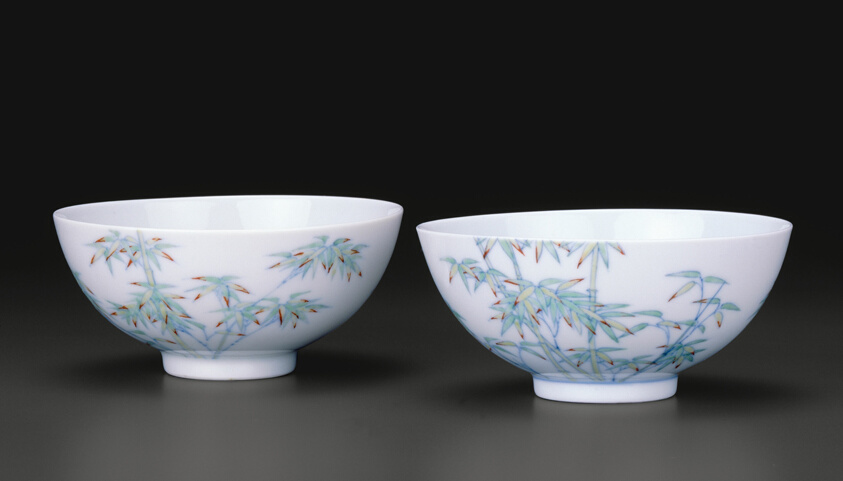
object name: Vessel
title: Pair of Teabowls with Bamboo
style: Chinese (culture or style)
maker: China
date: Qing dynasty (1644–1911), Yongzheng reign mark and period (1723–1735)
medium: Porcelain painted in underglaze blue and overglaze enamels (doucai)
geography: China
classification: drinking vessel; asian art; ceramics; vessel